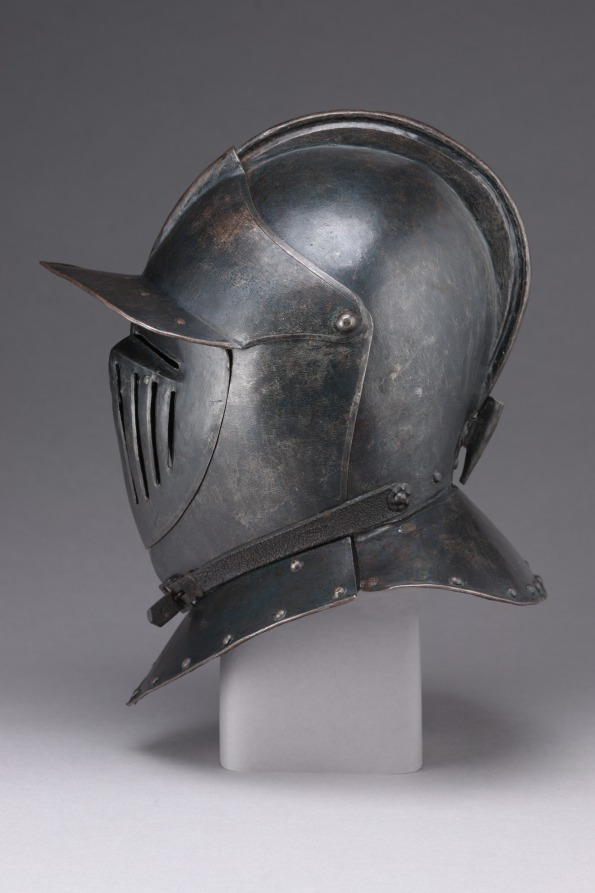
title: Cuirassier's Armor: Helmet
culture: Austria, Graz(?), early 17th century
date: c. 1600–20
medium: steel (originally blued, now black); leather straps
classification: Arms and Armor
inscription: Proof mark (musket shot) is located on the proper left side of the breastplate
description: The cuirassier was the heavy cavalryman of the late 1500s and early 1600s. Carrying pistols and a sword, he was clad in full armor, with the exception of his lower legs, which were protected by heavy riding boots. Shortly after 1650, such heavy cavalry armor disappeared from use. By then, European cavalries had abandoned full armor as impractical against the increased sophistication of firearms.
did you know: When assembled, this suit of armor is just over 5-1/2 feet tall.